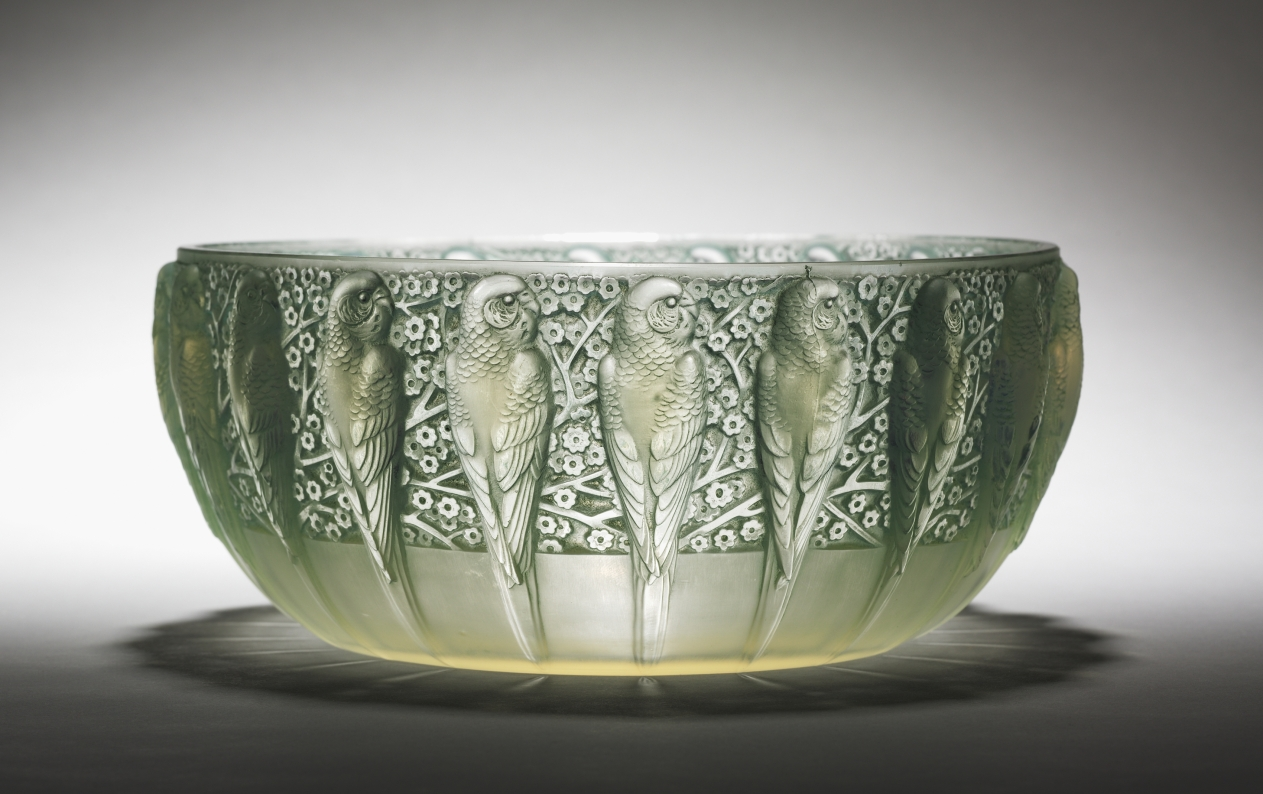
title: Parakeets (Perruches) Bowl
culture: France, 20th century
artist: René Lalique (French, 1860–1945)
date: 1931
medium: glass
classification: Glass